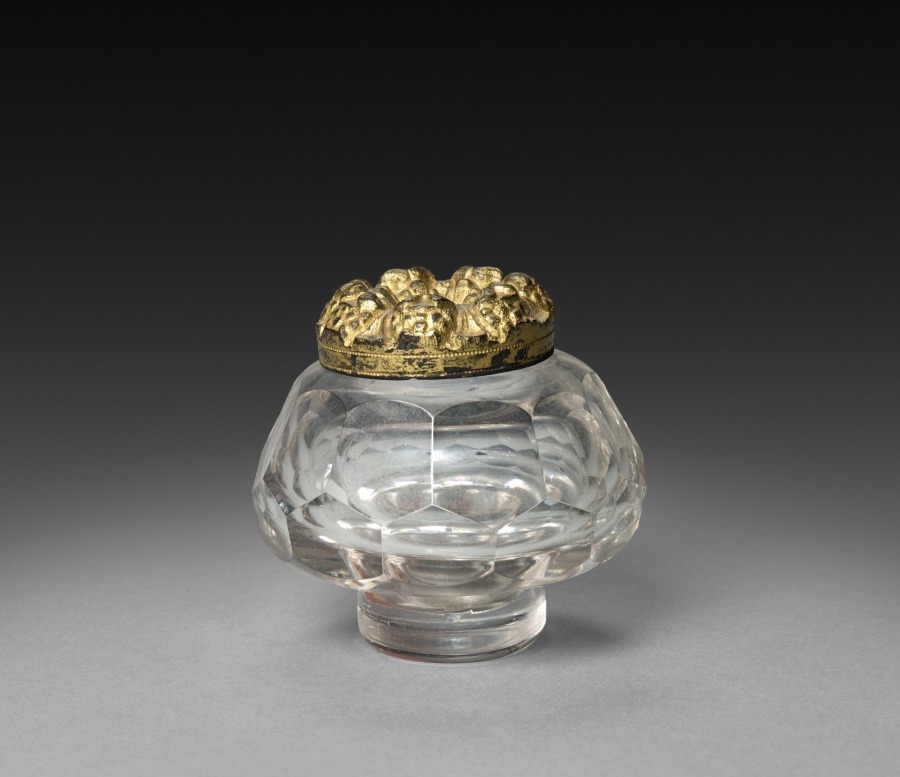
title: Inkwell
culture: England or America, 19th century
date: 1825–1850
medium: gilt bronze and glass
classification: Metalwork